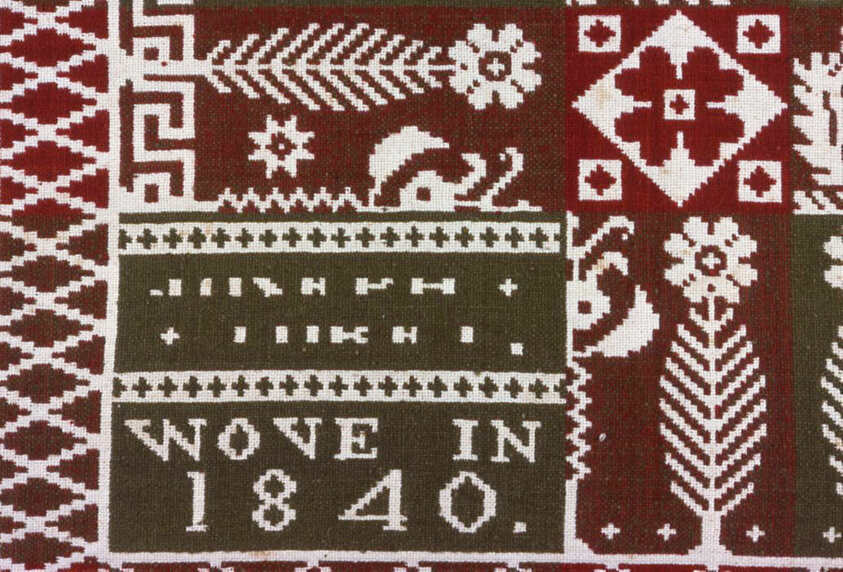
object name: Textile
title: Coverlet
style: 19th century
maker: United States, Pennsylvania, Chester County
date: 1840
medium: Cotton and wool, plain weave double cloth with main warp and extended ground weft fringe; two loom widths joined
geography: Pennsylvania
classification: weaving - coverlet; coverlet; weaving; textile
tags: diamond shapes, foliage, flowers, pine trees, lines, keys, squares, coverlet